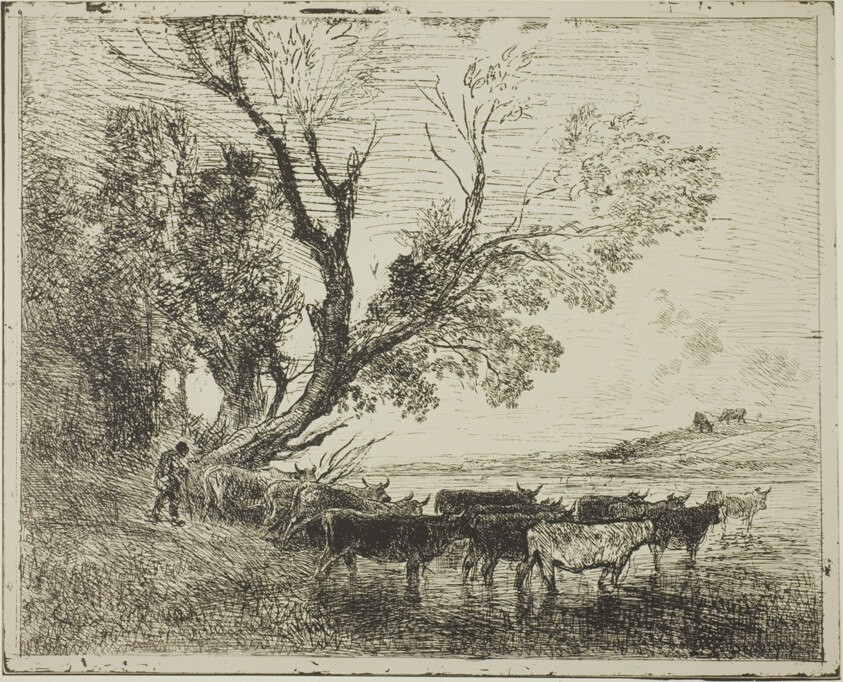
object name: Print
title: The Ford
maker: Charles François Daubigny (French, 1817-1878)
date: 1862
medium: Cliché-verre on ivory photographic paper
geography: France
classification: cliché-verre; print; prints and drawing